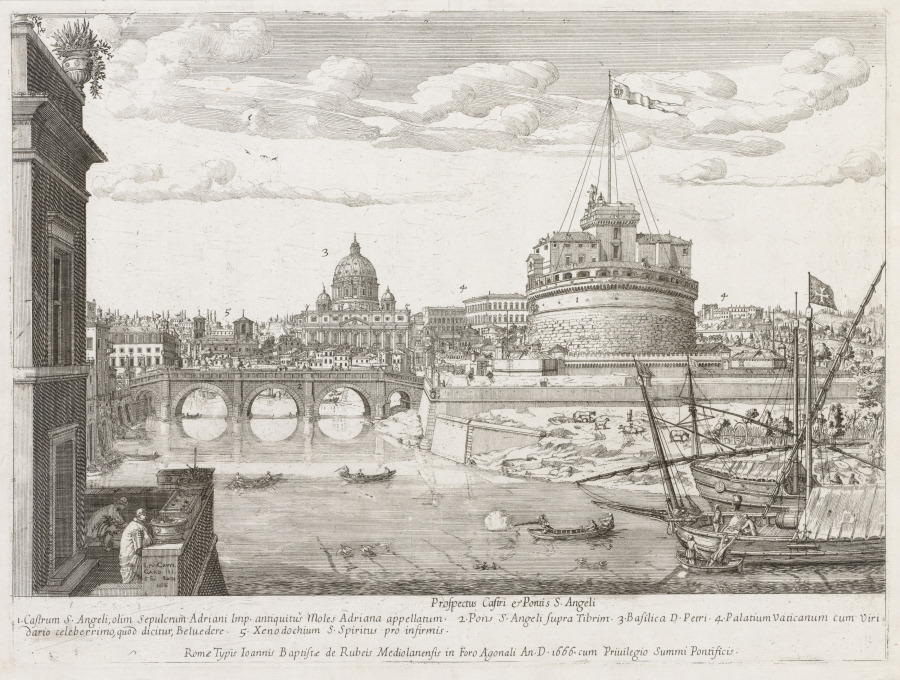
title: St. Angelo from "Prospectus Locurum Urbis Romae Insign[ium]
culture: Flanders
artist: Lievin Cruyl (Flemish, c. 1640-c. 1720)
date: 1666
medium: etching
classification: Print